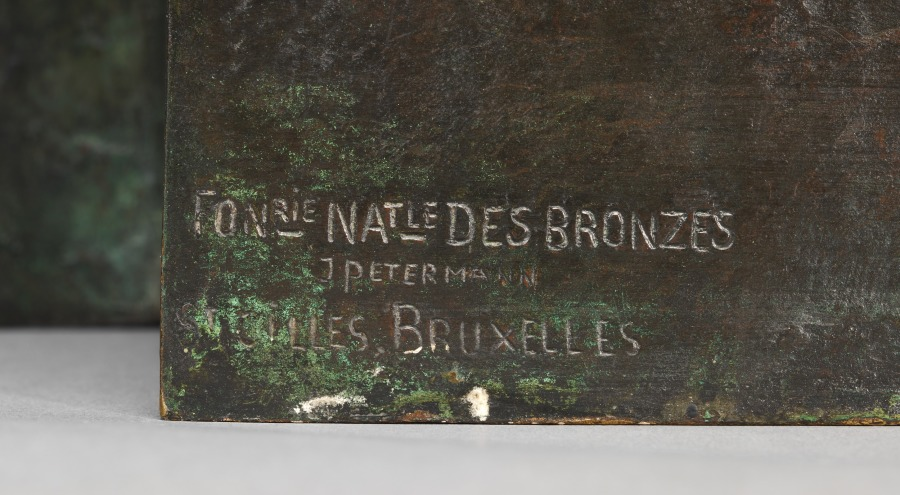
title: Head of Beethoven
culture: France, 19th century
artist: Emile Antoine Bourdelle (French, 1861–1929)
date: 1891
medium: bronze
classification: Sculpture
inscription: Signed left side: "Bourdelle / Sculpt."; inscribed right side: "FONRIENATLE DES BRONZES / J PETERMANN: ST GILLES BRUXELLES"; inscribed on front: "Mon domaine c'est l'air / quand le vent, se leve / mon âme tourbillonne / Beethoven"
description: A pioneer of modern sculpture, Antoine Bourdelle studied at the École des Beaux-Arts in Paris and worked as an assistant to Augustin Rodin, who greatly admired the younger artist’s work. In 1888 Bourdelle produced the first of a series of sculptural portraits of Ludwig van Beethoven, in which the artist orchestrated powerful billowing shapes to convey the creative spirit or genius of the composer. The artist inscribed a quote from Beethoven in the lower left: “My domain is the air; when the wind rises my soul swirls.”